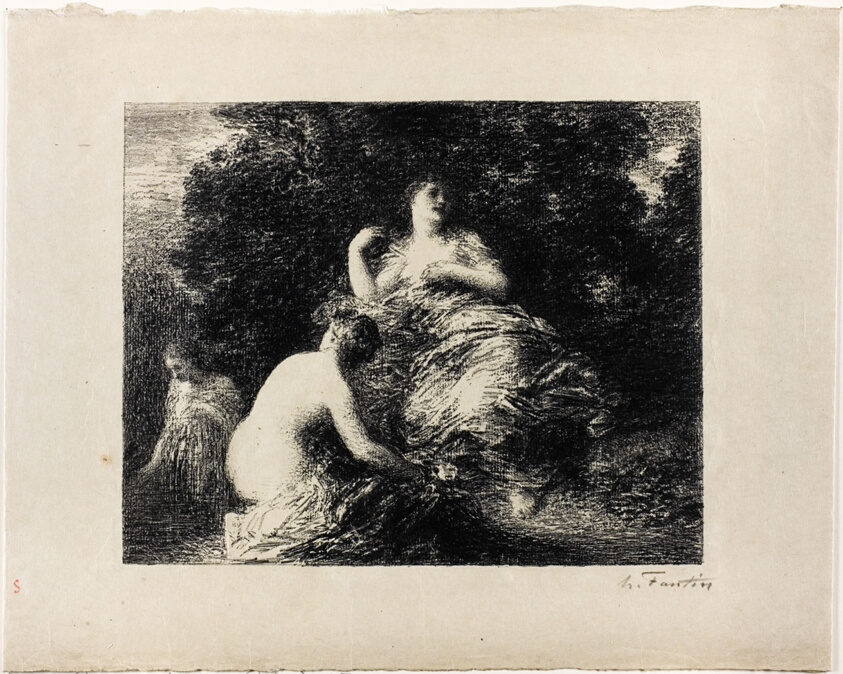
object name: Print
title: Bathing Women, medium plate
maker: Henri Fantin-Latour (French, 1836-1904)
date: 1896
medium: Lithograph in black on cream Japanese paper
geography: France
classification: lithograph; print; prints and drawing